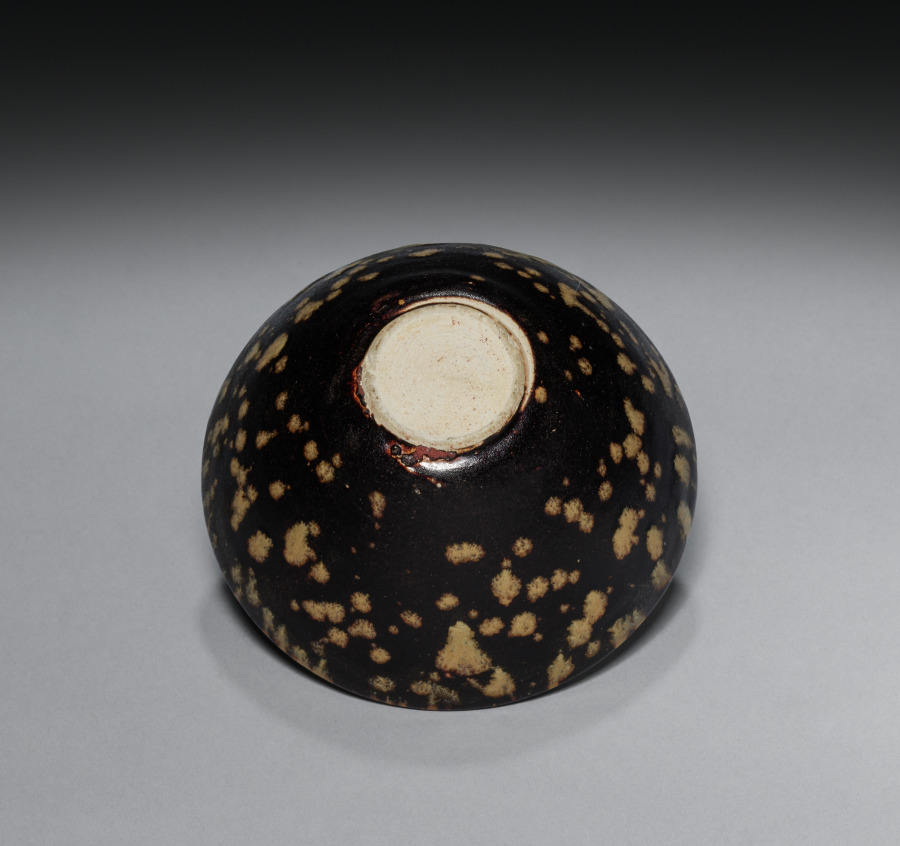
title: Teabowl with Tortoiseshell Glaze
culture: China, Jiangxi Province, Southern Song dynasty (1127–1279)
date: 1100s–1200s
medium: Brown-glazed stoneware with "tortoiseshell" pattern, Jizhou ware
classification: Ceramic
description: This teacup with a so-called tortoiseshell glaze is a fine example of southern ware from Jizhou, where potters specialized in brown splashed glazes sometimes resembling partridge feathers or tortoise shells. The variety of dark glazes and vessel types produced by the Jizhou kilns are evidence of the popularity of black ware at the time. Jizhou kiln potters competed with the Jian kilns which produced almost exclusively teacups, such as the Black-Glazed Teabowl (CMA 2020.176) and the Black-Glazed Teabowl with Incised Characters (CMA 2020.175).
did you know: The Jizhou kiln site is designated as one of fifty-one Major National Historical and Cultural Sites in Jiangxi province.